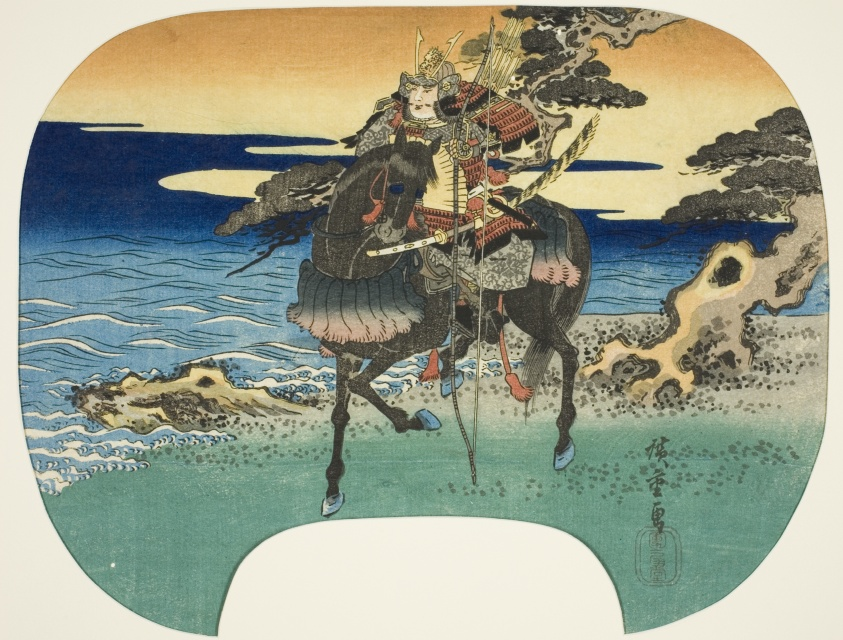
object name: Print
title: Warrior on horseback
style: Japanese (culture or style)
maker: Utagawa Hiroshige 歌川 広重; Japanese, 1797-1858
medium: Color woodblock print; uchiwa-e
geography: Japan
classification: woodblock print; print; asian art